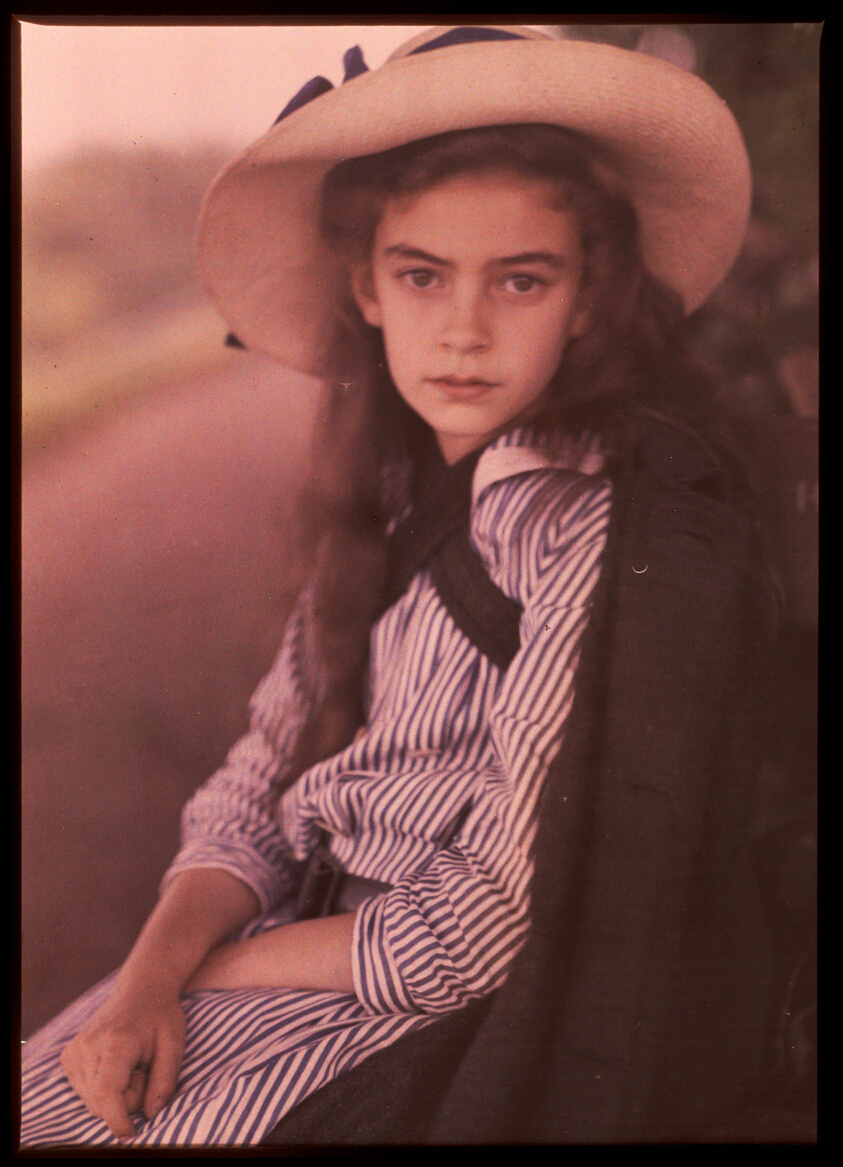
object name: Photograph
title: Child with Striped Dress (Younger Raab Child)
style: Pictorialism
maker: Alfred Stieglitz (American, 1864–1946)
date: 1907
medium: Autochrome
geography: United States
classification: autochrome; photographic process; photography; photograph